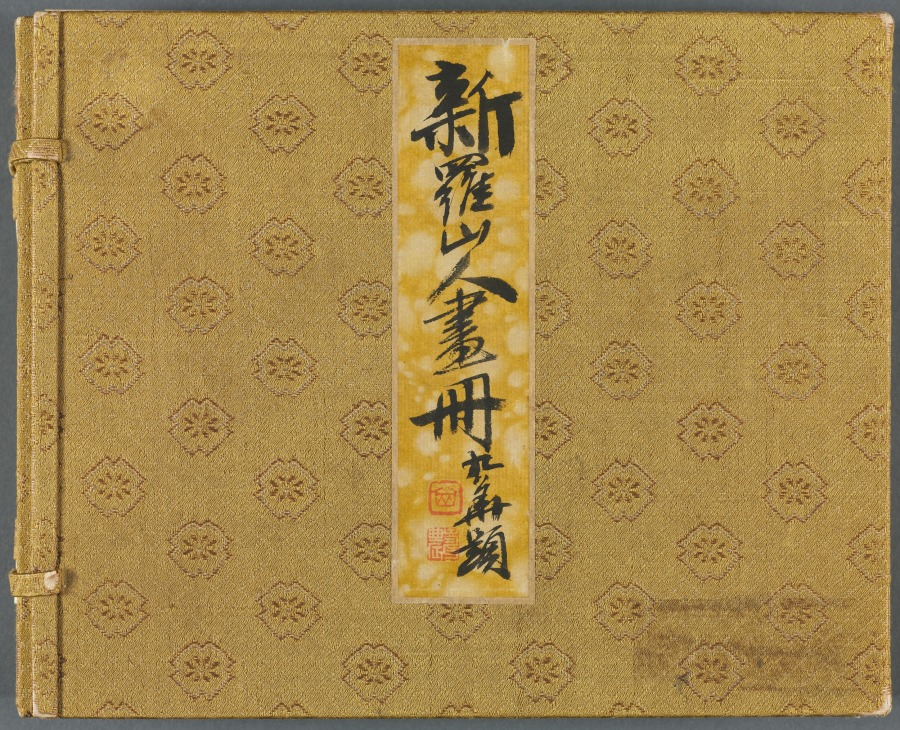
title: Album of Landscape Painting Illustrating Old Poems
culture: China, Qing dynasty (1644–1911)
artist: Hua Yan (Chinese, 1682–c. 1765)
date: 1745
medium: Album of twelve leaves; ink and light color on paper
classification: Painting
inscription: 新羅山人畫冊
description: Hua Yan is one of the Eight Eccentrics of Yangzhou, who rejected orthodox ideas about painting.